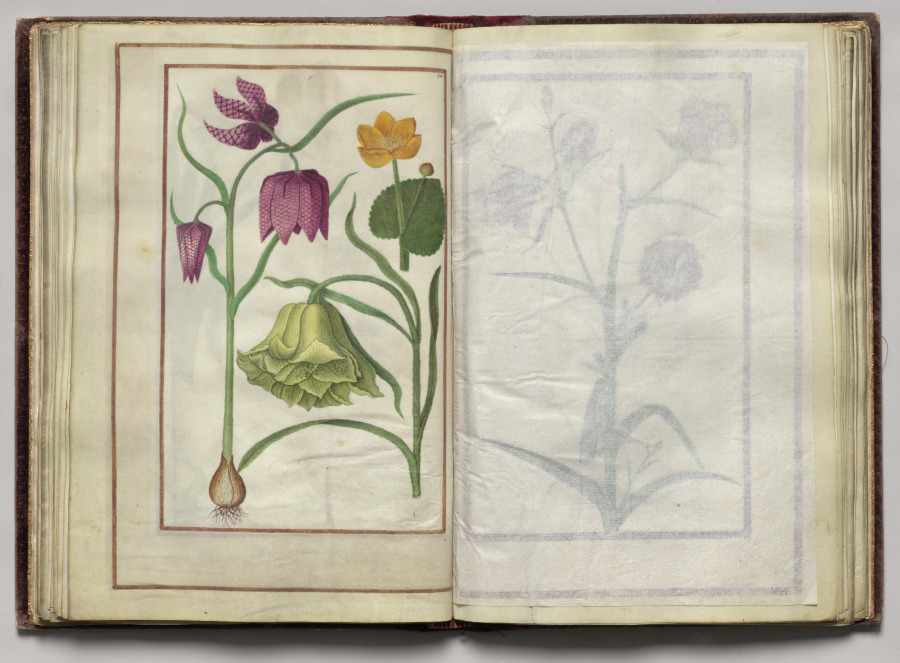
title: Fritillaria Meleagris and Ranunculus, folio 26 (verso), from Florilegium (A Book of Flower Studies)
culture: France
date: 1608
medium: watercolor, ink, silver, and gold over occasional traces of pencil, on vellum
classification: Bound Volume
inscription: Dated: Poitiers 1608 (on frontispiece) Signed: On frontispiece in black ink, lower right: Van Kuyk Notation on drawing: Frontispiece: in pencil, lower margin: * élève de Van Kessel, peintre flammand (* in pencil also appears in front of Van Kuyk's name).